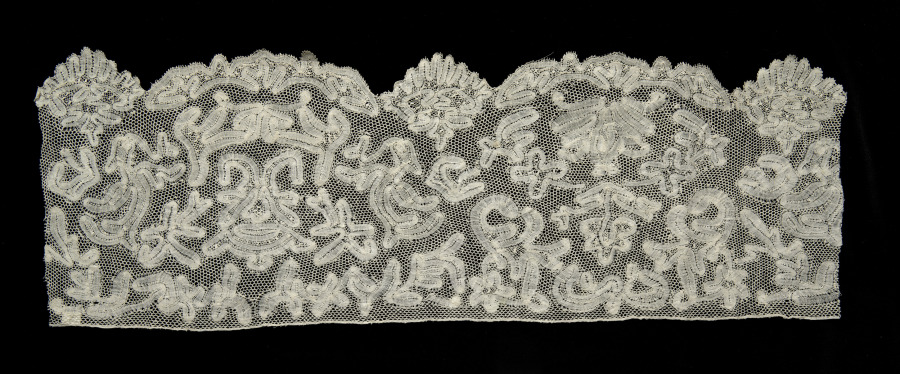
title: Fragment of Lace Flounce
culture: Italy, Abruzzi, Pescocostanzo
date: 1800s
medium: Linen: bobbin lace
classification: Lace